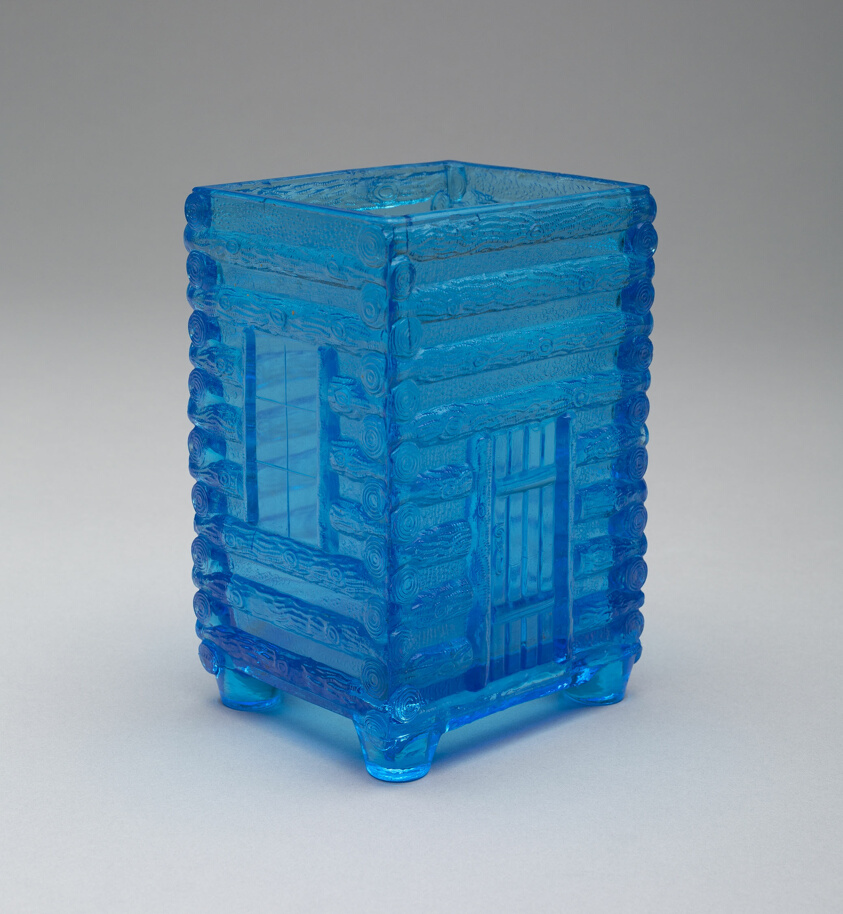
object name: Glass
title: "Log Cabin" pattern spooner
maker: Central Glass Company (Wheeling, West Virginia)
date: c. 1875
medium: Pressed blue glass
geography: Wheeling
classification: glass; container; spoon holder; american decorative arts; american arts; decorative arts